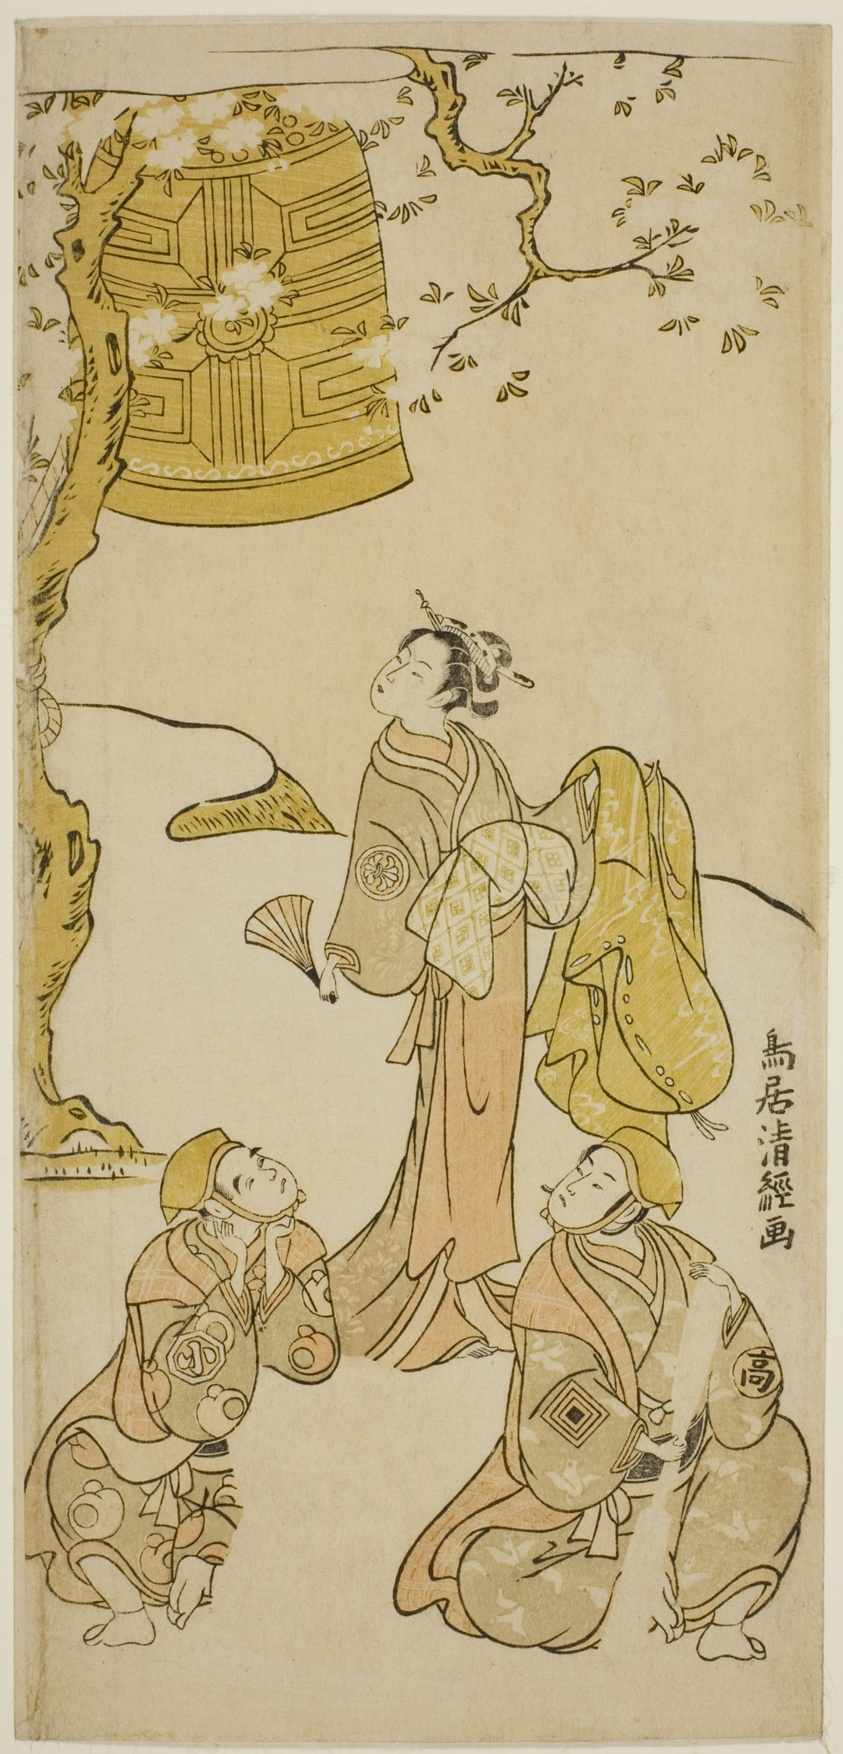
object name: Print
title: The Actors Segawa Kikunojo II, Ichikawa Komazo II, and Arashi Otohachi I in the play "Fude Hajime Soga no Tamazusa," performed at the Nakamura Theater in the first month, 1768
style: Japanese (culture or style)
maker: Torii Kiyotsune (Japanese, active c. 1757-79)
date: 1768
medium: Color woodblock print; hosoban, benizuri-e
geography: Japan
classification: woodblock print; print; asian art